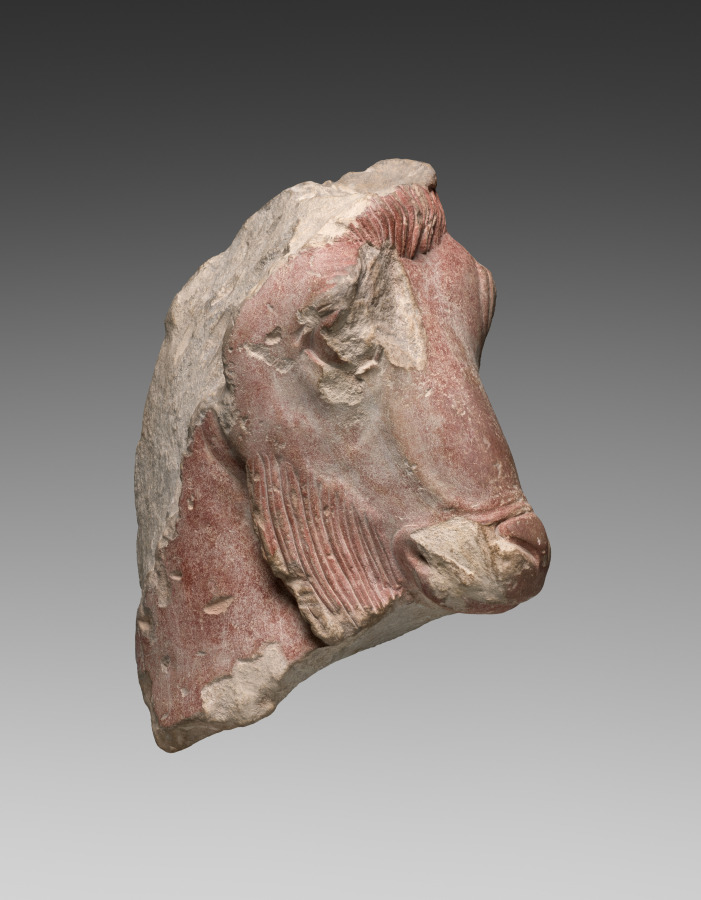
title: Fragment of a Goat's Head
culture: Greece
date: c. 500–475 BCE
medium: limestone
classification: Sculpture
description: Initially identified as a horse head, this fragmentary sculpture, once painted reddish-brown, has a beard, indicating that it depicts a goat. Its large size, however, together with its neck position and unusual round eye, have all prompted questions. Was the head broken from a rearing goat? Or did it represent Pan, the rustic shepherd god often depicted as half-man, half-goat? If Pan, some scholars have connected it with a fifth-century BC Athenian sanctuary erected to thank the god for aid in battle. An alleged provenance near the Athenian Acropolis supported this idea, but scientific tests suggest otherwise.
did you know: Pan, the goat-headed god, is often called a son of Hermes, but sources disagree.